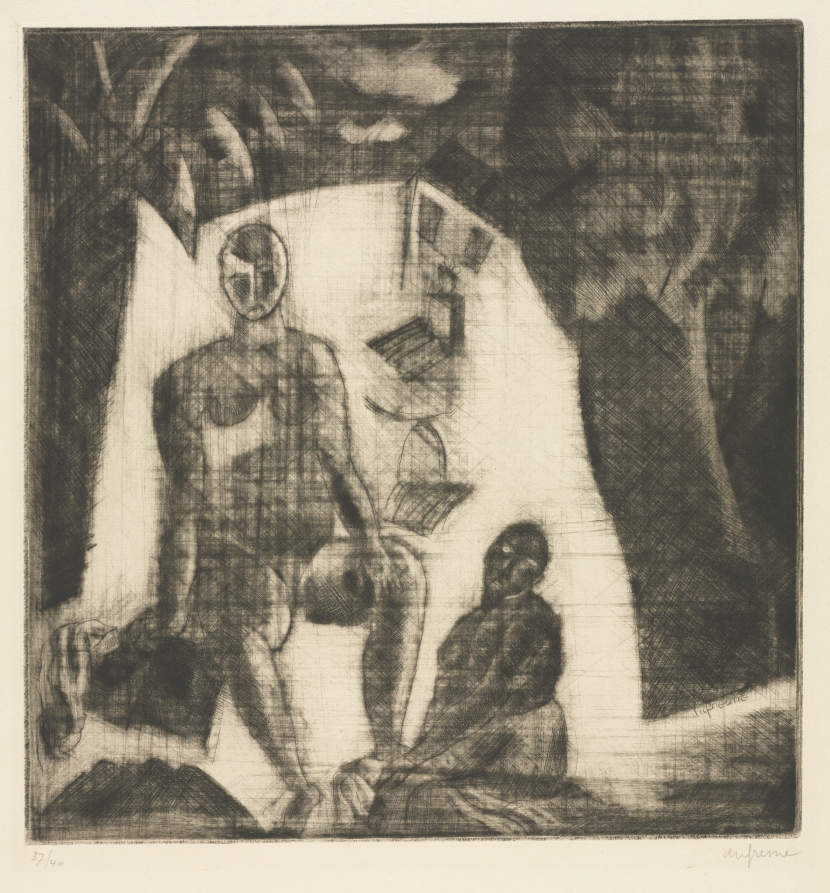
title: Sortie de bain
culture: France, 20th century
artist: Charles Georges Dufresne (French, 1876–1938)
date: c. 1931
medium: etching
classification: Print